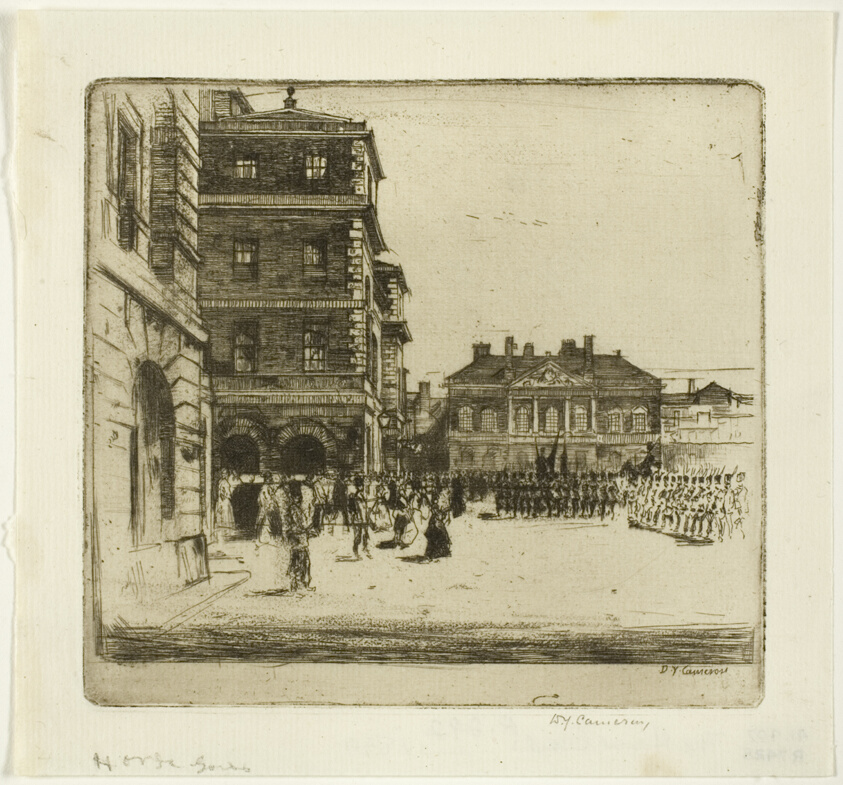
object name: Print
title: The Horse Guards, plate four from the London Set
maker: David Young Cameron (Scottish, 1865-1945)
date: 1899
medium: Etching on ivory laid paper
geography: Scotland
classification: etching; print; prints and drawing